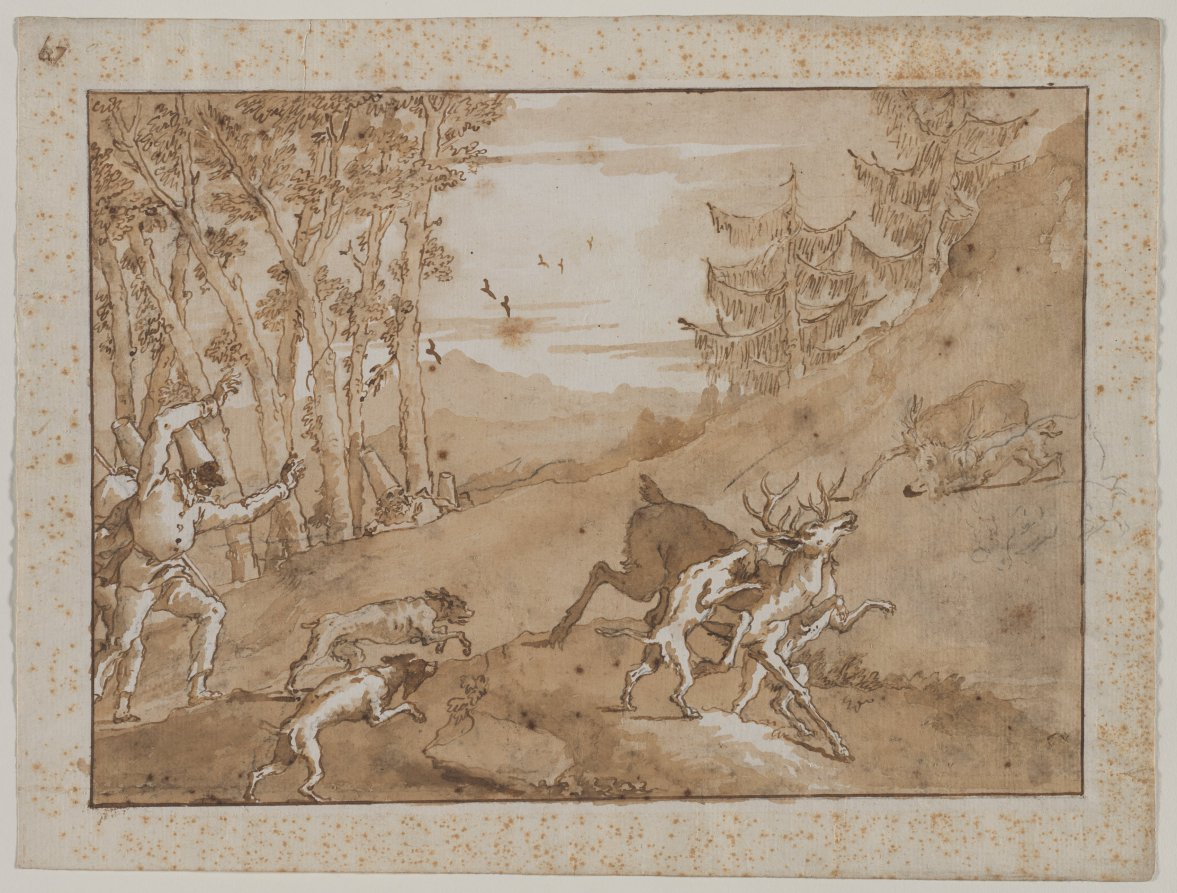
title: The Stag Hunt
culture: Italy, 18th century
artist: Giovanni Domenico Tiepolo (Italian, 1727–1804)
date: 1790s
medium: pen and brown ink and brush and brown wash, with black chalk; framing lines in brown ink and graphite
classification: Drawing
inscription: upper left, in brown ink: 67 [strengthened in graphite] ; upper left, in graphite: o